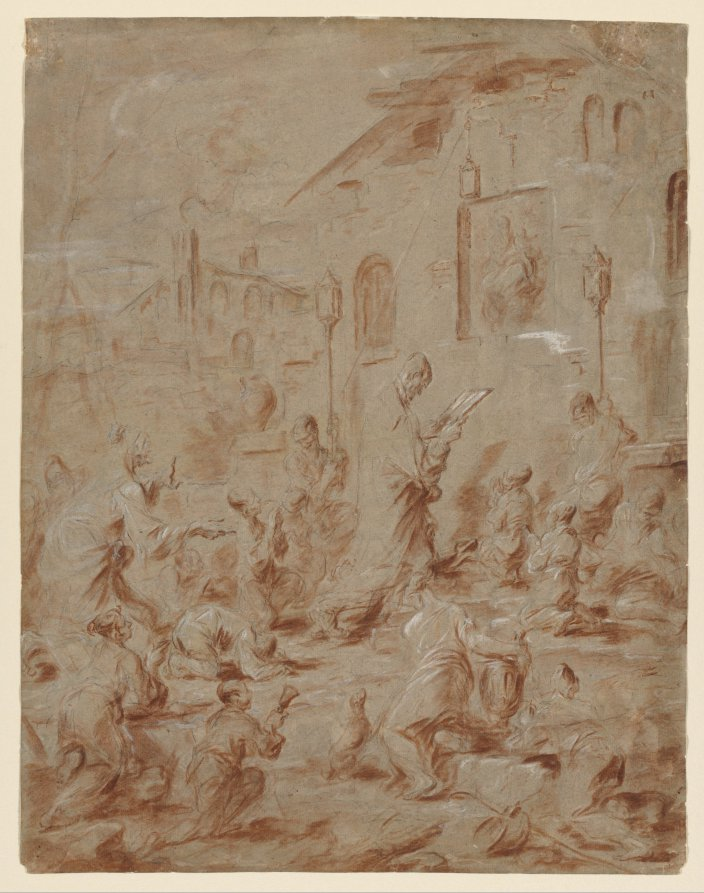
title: Worshippers at a Street Shrine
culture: Italy, 18th century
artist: Alessandro Magnasco (Italian, 1667–1749)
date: 1730/40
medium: brush and red-brown ink and black chalk, heightened with lead white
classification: Drawing